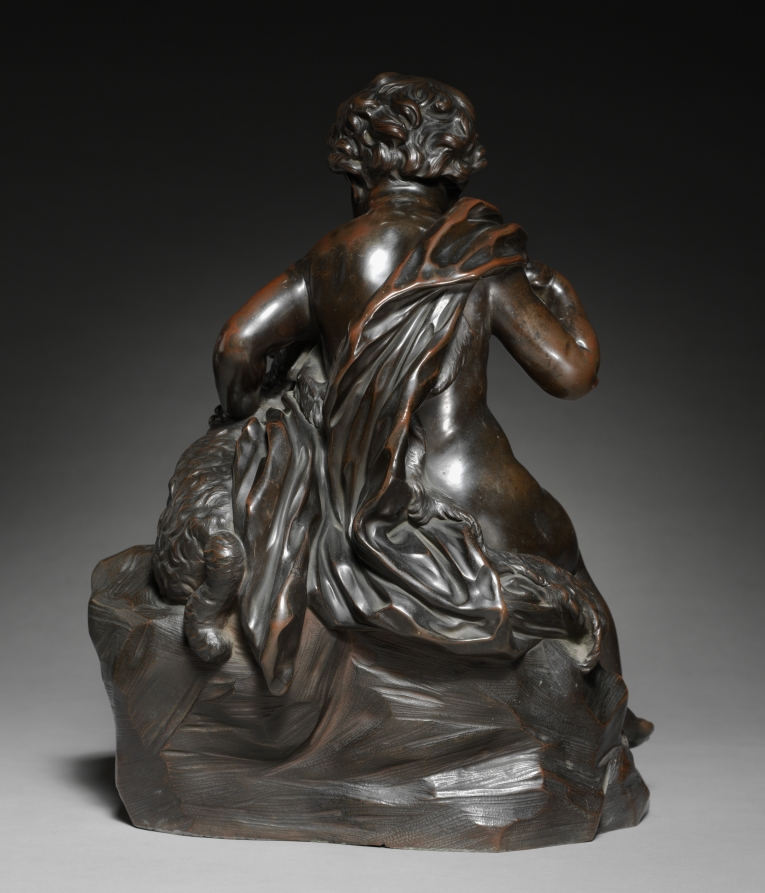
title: Young Saint John and the Lamb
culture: Italy, Florence, 17th century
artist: probably by Giuseppe Piamontini (Italian, 1664–1742)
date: c. 1680–1700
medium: bronze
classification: Sculpture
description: John the Baptist is often accompanied by a lamb as a sign of his intimacy with Christ, the Lamb of God. The depiction of children embracing animals is a motif from antiquity that Piamontini would have known.